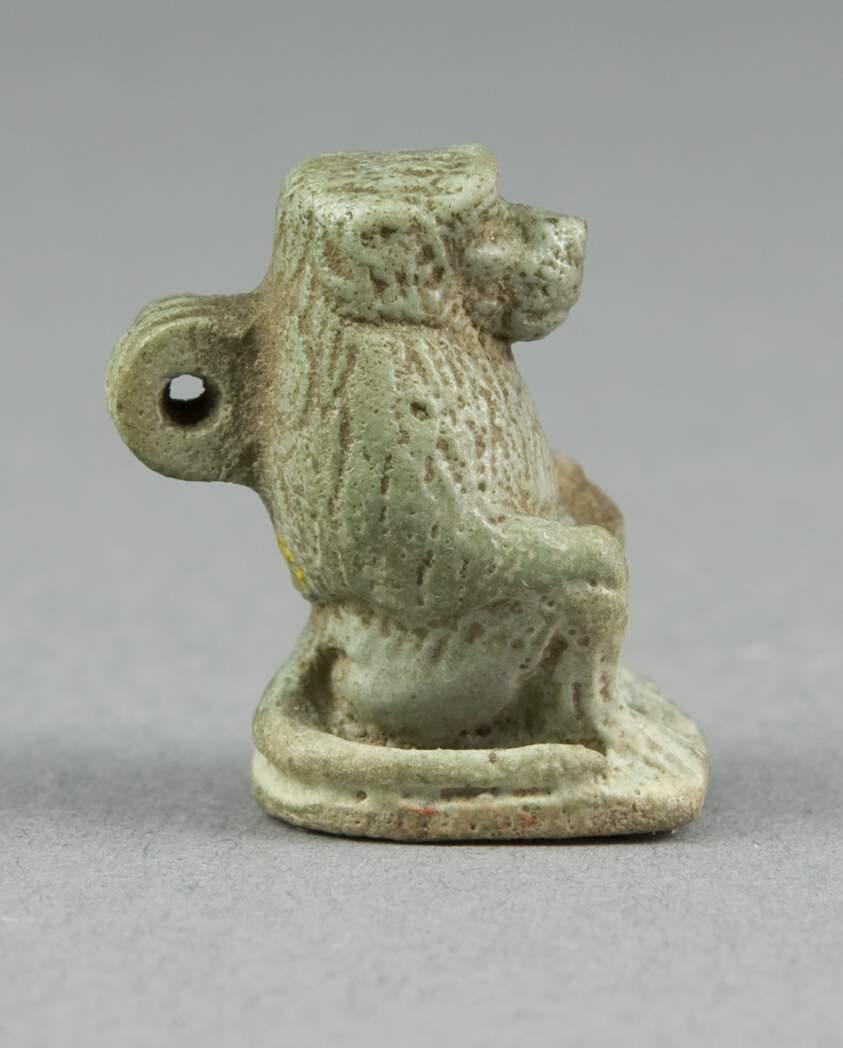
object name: Costume and Accessories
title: Amulet of a Baboon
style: third intermediate period, ancient, egyptian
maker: Egyptian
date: Third Intermediate Period, Dynasty 21–25 (1070–656 BCE)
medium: Faience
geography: Egypt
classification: amulet; jewelry; ceramics; ancient art; costume; faïence (composite material)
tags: baboon, gods (deities), deities